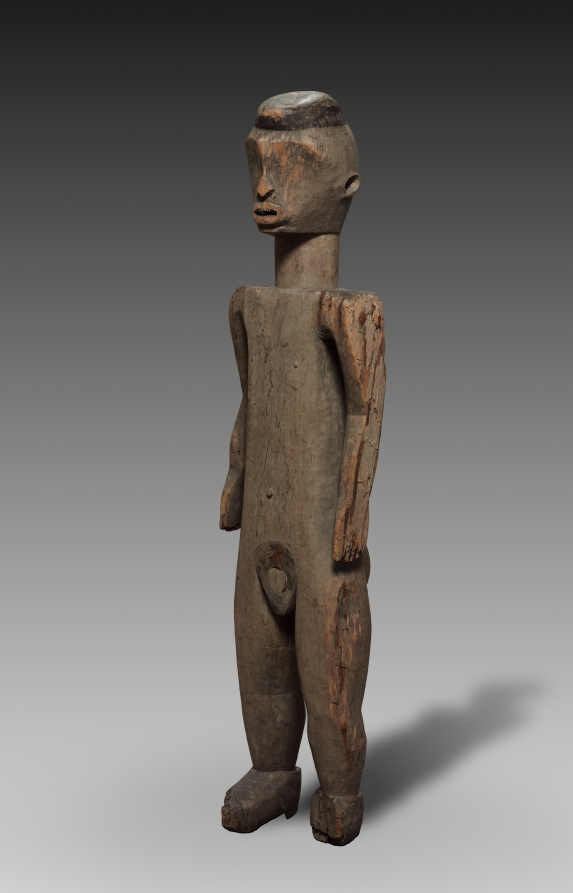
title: Figure of a Pair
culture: Africa, Central Africa, Democratic Republic of the Congo or Central African Republic (most likely), possibly Monzombo-style maker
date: late 1800s–early 1900s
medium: Wood and iron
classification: Sculpture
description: The Ubangi region's history of successive migrations and assimilations has resulted in numerous exchanges of religious beliefs and ritual practices. Despite some stylistic traits, including the heart-shaped faces and the male's crested coiffure, this figure with its female pair is unlike any other in the Ubangian corpus. Based on indirect evidence, the pair is said to represent the culture's primordial couple.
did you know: This pair is of a male and female and is said to represent the culture's primordial couple. There are no other carved mother-child figures that originate from the Monzombo ethnic group.